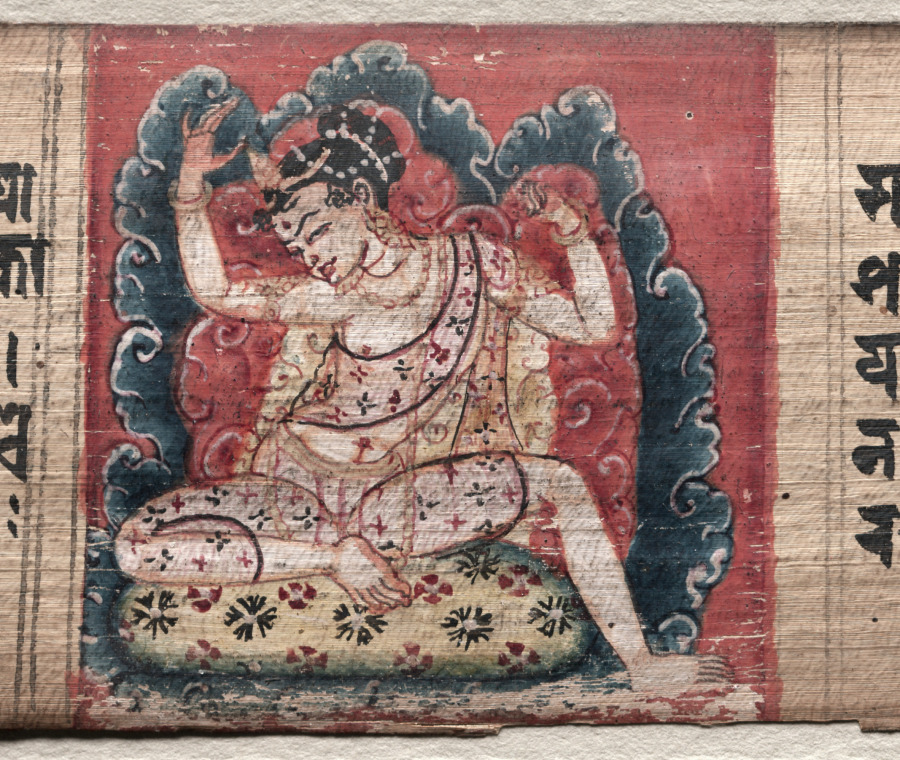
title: Samantabhadra spinning clouds of things, folio 22 (recto) from a Gandavyuha-sutra (Scripture of the Supreme Array)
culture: Nepal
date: 1000–1100s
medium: gum tempera and ink on palm leaf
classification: Painting